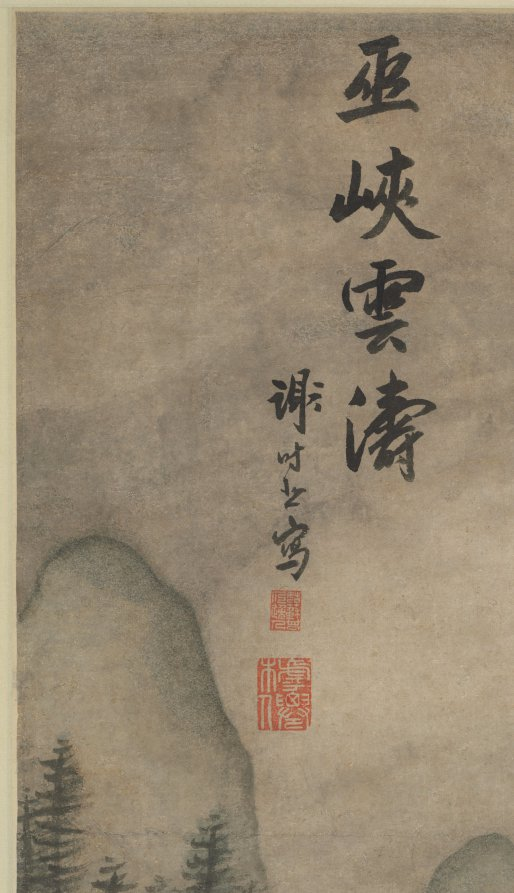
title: Clouds and Waves at the Wu Gorge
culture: China, Ming dynasty (1368–1644)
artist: Xie Shichen (Chinese, 1487–after 1567)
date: c. 1547–67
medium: hanging scroll; ink and light color on paper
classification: Painting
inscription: "巫峽雲濤" 謝時臣寫 [印] 姑蘇台下逸人; 樗仙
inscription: 5 additional seals of Cheng Qi 程琦 (1911–1988).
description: This dramatic landscape was probably painted after Xie Shichen returned from a journey in 1547 that took him through various provinces of China, including Sichuan Province in southwest China and sailing the Yangzi River. The composition from a high vantage point offers a view deep into the Wu Gorge where rolling waves put a ship in peril. The scale and composition of this landscape, which was inspired by the majestic mountain scenery in Sichuan Province, as well as Xie’s vigorous brushwork, are exceptional.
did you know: This large painting was likely created for a wealthy or powerful family's grand hall to impress their visitors.